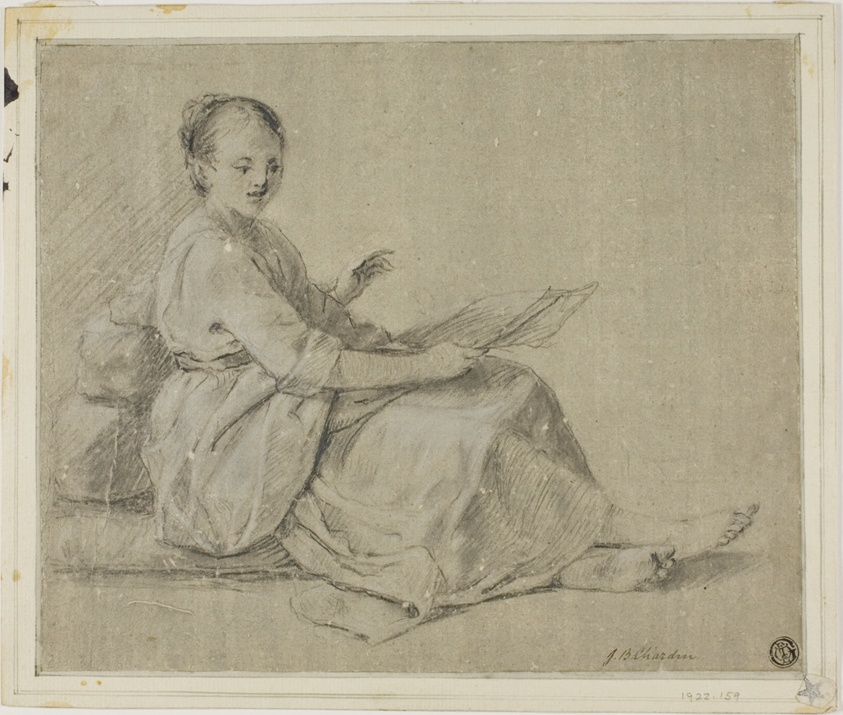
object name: Drawing and Watercolor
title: Barefoot Woman Seated on Ground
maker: Jean Baptiste Siméon Chardin (French, 1699-1779)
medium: Graphite with brush and gray wash and touches of black gouache, heightened with white gouache, on ivory wove paper prepared with a greenish-gray wash, laid down on ivory laid card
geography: France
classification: pen and ink drawings; drawings (visual works); prints and drawing